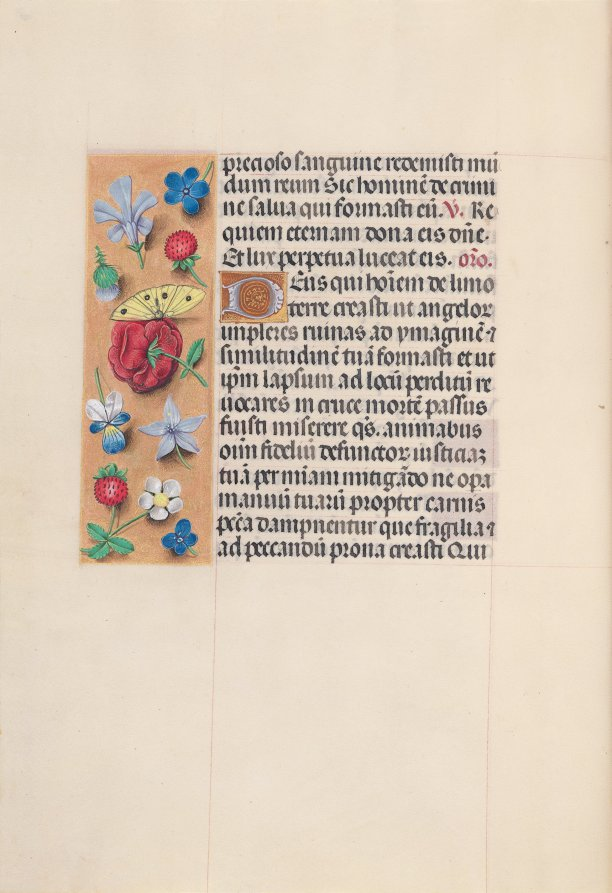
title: Hours of Queen Isabella the Catholic, Queen of Spain: Fol. 29v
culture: Flanders, Ghent and Bruges, late 15th century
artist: Master of the First Prayerbook of Maximillian (Flemish, c. 1444–1519)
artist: and Associates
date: c. 1500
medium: ink, tempera, and gold on vellum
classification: Bound Volume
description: A great lover of Flemish art, Queen Isabella treasured her many devotional books. This deluxe manuscript was created for her private devotions by highly organized and distinctly talented manuscript painters active in Ghent and Bruges. The Ghent-Bruges school represents the culmination of Flemish book painting, whose main features were the use of rich colors, illusionistic effects, a love of landscape, and a strong sense of visual narrative. Manuscripts produced by this circle of artists are renowned for their border decoration featuring a rich variety of realistically painted flowers, scrolling acanthus leaves, birds, and butterflies.